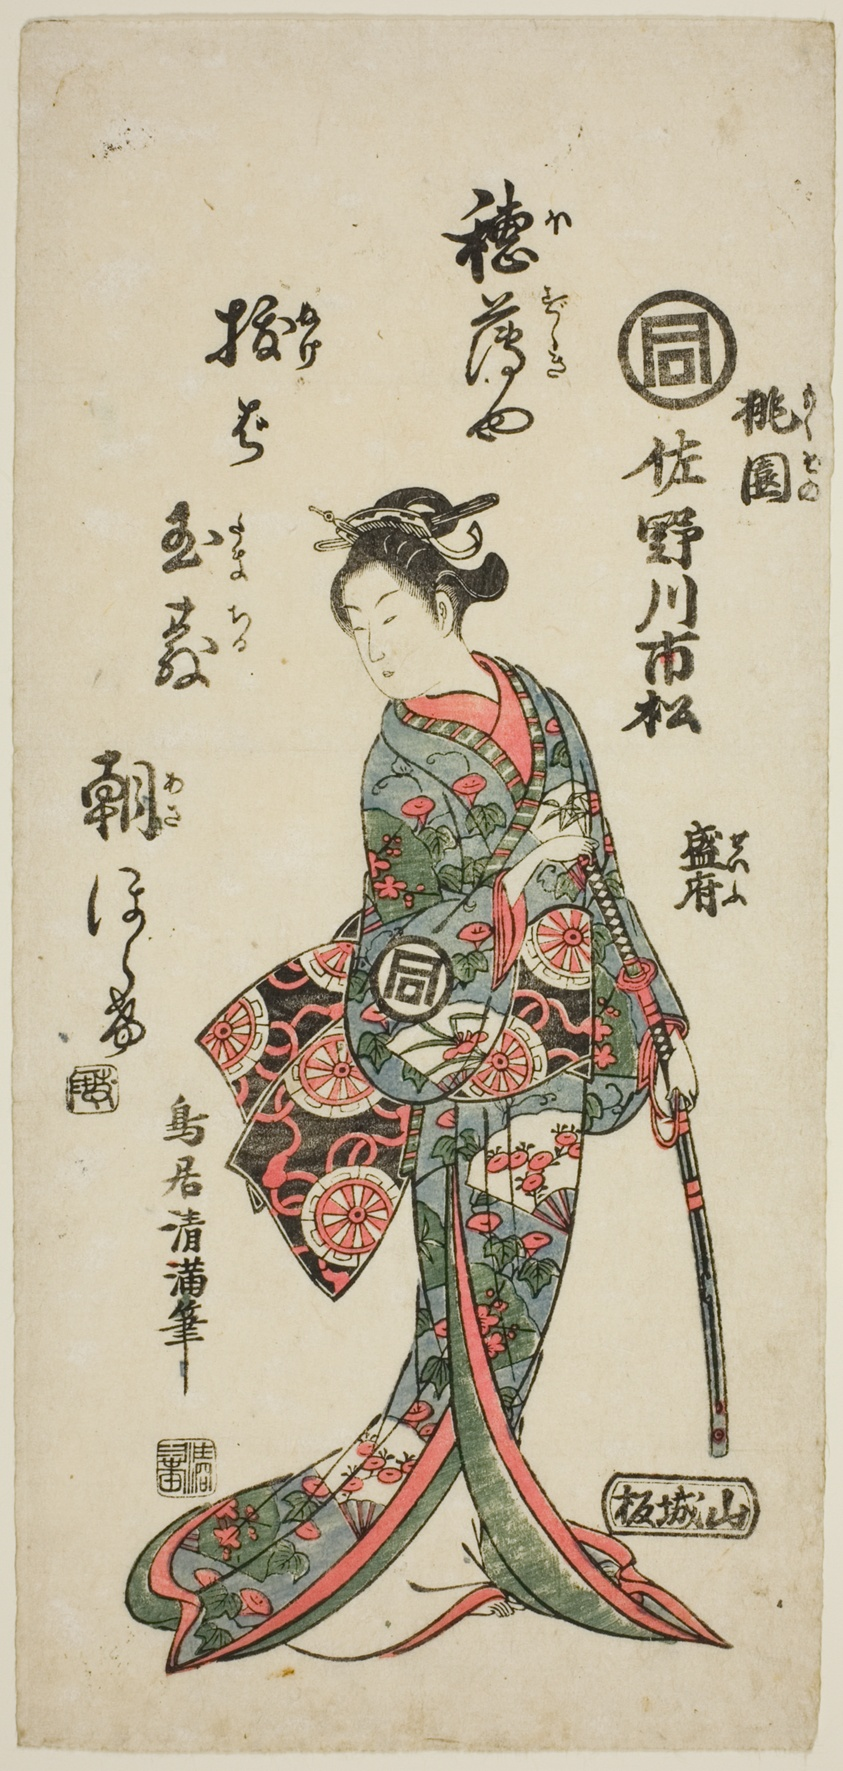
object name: Print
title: The Actor Sanogawa Ichimatsu I as Momozono in the play "Katakiuchi Mogami no Inabune," performed at the Ichimura Theater in the seventh month, 1759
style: Japanese (culture or style)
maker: Torii Kiyomitsu I (Japanese, 1735–1785)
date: 1759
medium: Color woodblock print; hosoban, benizuri-e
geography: Japan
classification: woodblock print; print; asian art